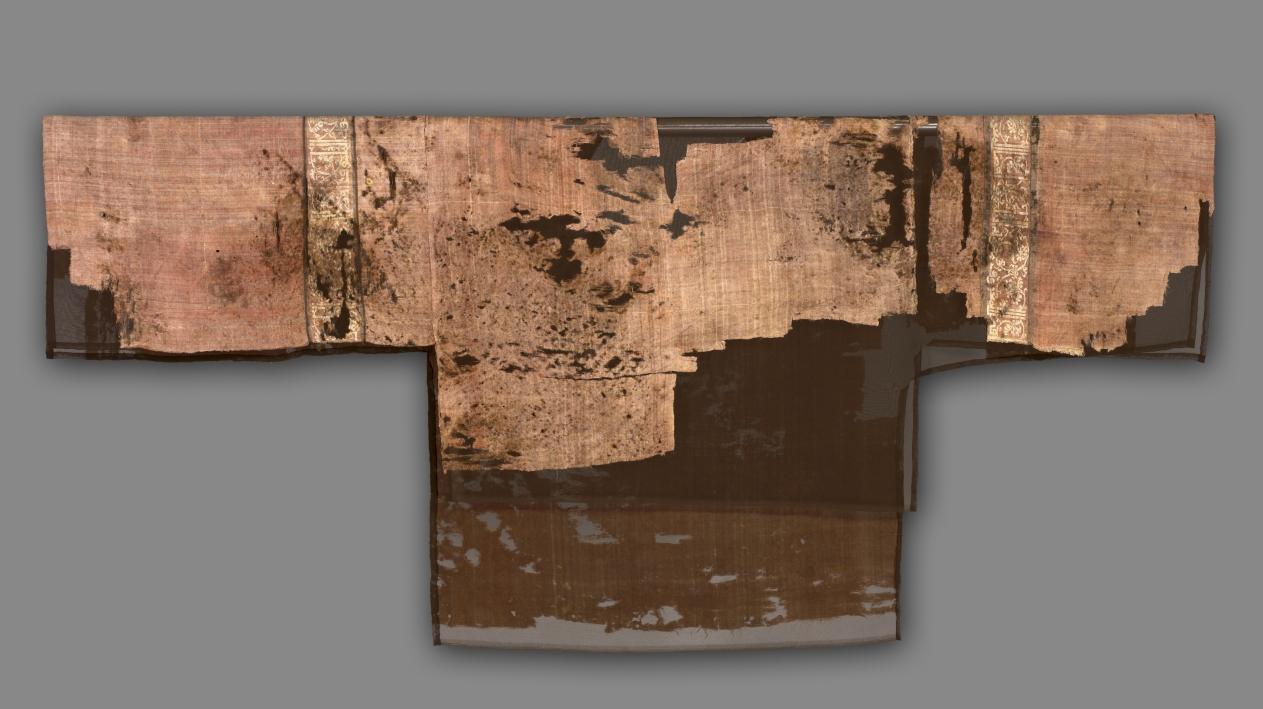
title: Tunic with Ornamental Inscription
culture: Iran or Iraq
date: 1329–1955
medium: Silk: lampas weave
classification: Textile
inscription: Afdal al-ma 'ruf ma'unat al-malhuf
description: The sleeves, neck opening, and most of the front area nearly to waist are preserved; the back has large areas missing. The foliated inscription bands on the sleeves near the shoulder seams are in white (faded from blue) on a pink and brown ground.